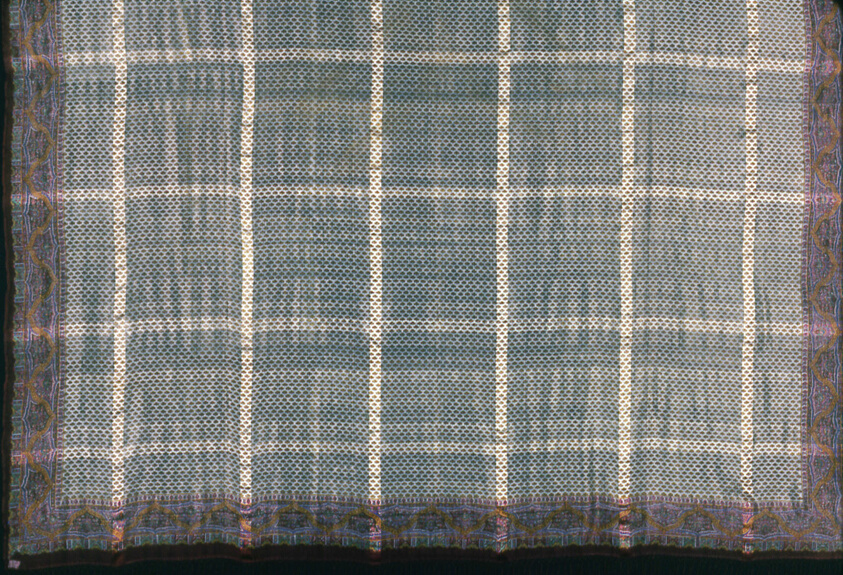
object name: Textile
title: Long Shawl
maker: England, Norwich or France, Lyon or Scotland, Paisley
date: 1850/75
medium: Silk, gauze weave and broken twill weave; block printed; warp fringe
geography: Norwich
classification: textile; weaving - printed